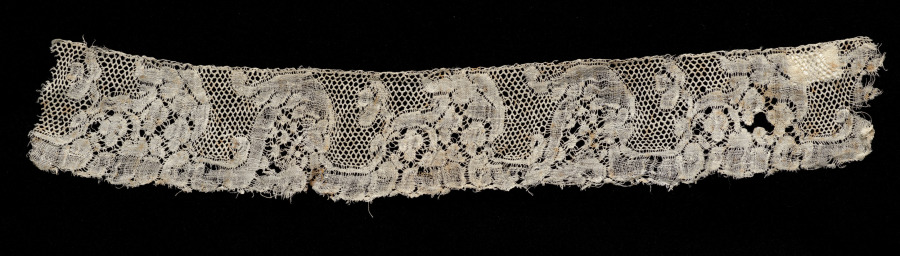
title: Lace Edging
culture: France, Valenciennes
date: 1700s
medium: Linen: bobbin lace (Valenciennes)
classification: Lace